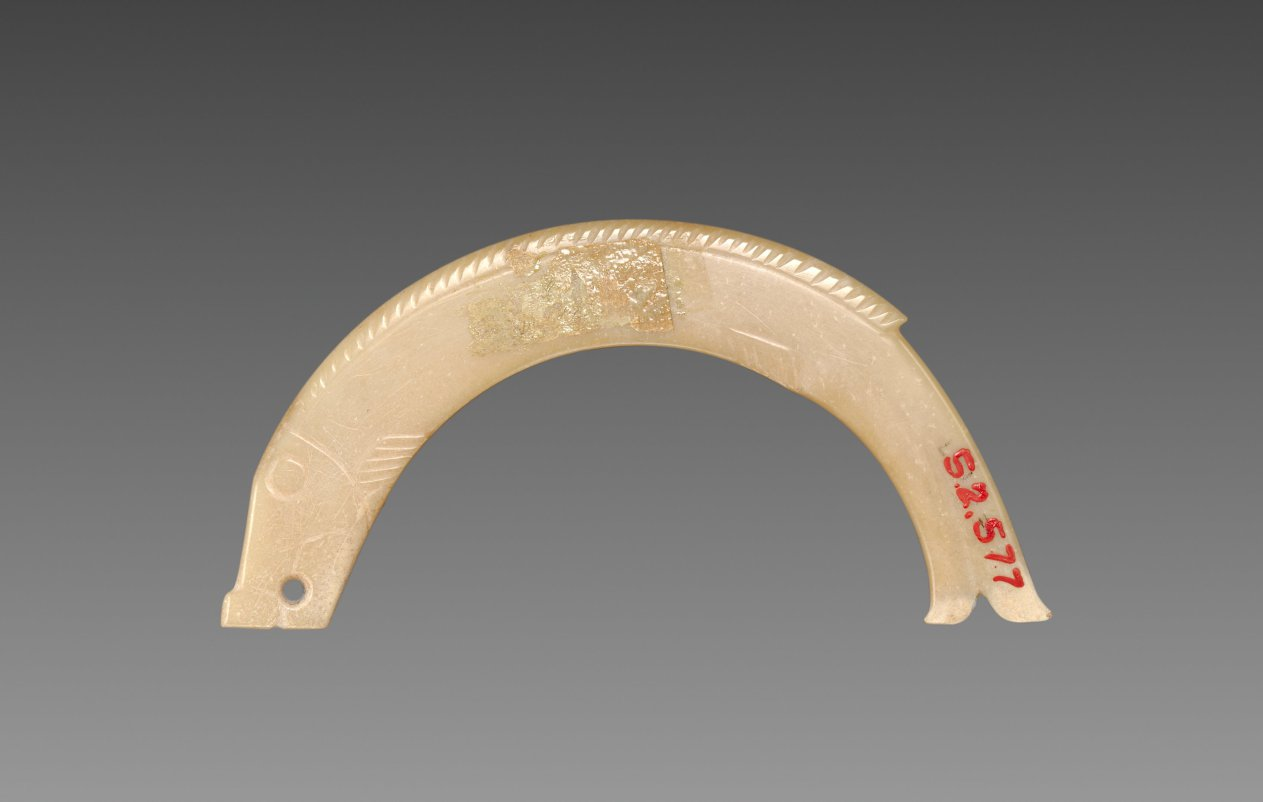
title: Arc-Shaped Jade Fish Pendant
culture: China, Western Zhou dynasty (c. 1046–771 BCE)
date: c. 1050–900 BCE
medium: nephrite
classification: Jade